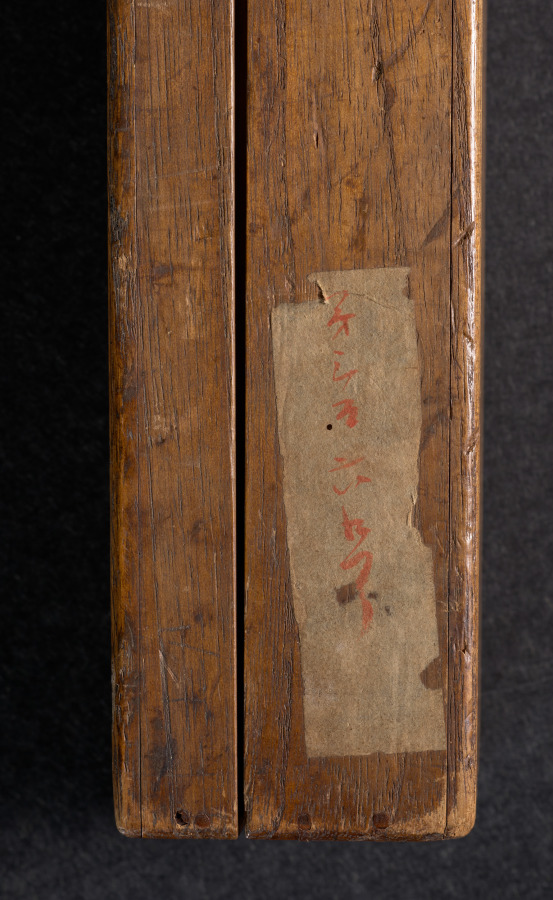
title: Kanzan Holding a Scroll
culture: Japan, Muromachi period (1392–1573)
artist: Unpo Shūkū (Japanese, active 1400s)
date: 1400s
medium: hanging scroll; ink on paper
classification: Painting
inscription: signed: "Unpo"